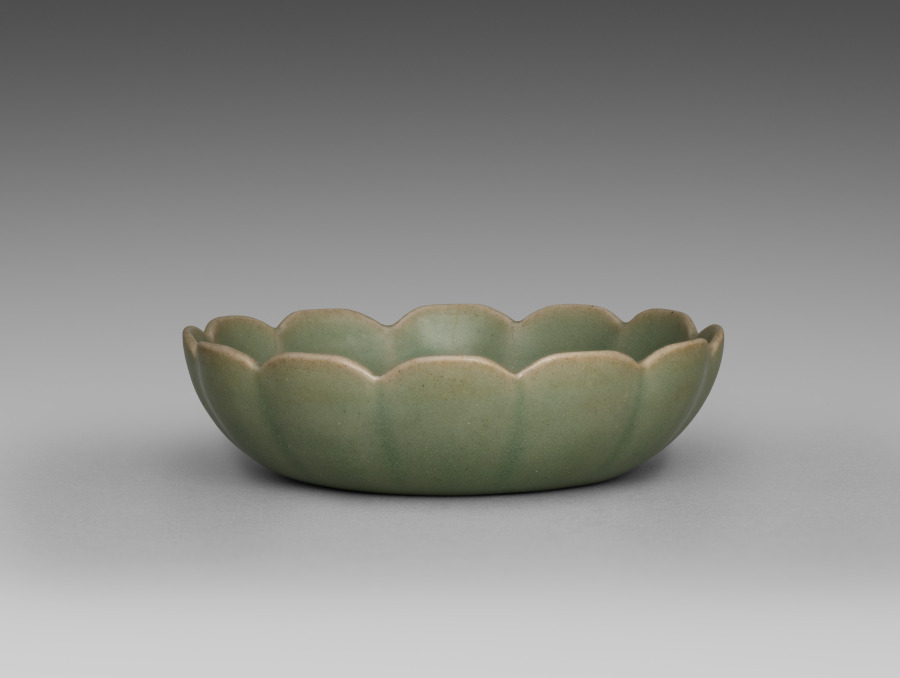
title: Celadon Dish with Molded Phoenix Design in the Shape of a Flower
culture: Korea, Goryeo dynasty (918–1392)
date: 1200s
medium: Celadon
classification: Ceramic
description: Celadon wares intended for everyday use—such as this dish—were among the most common burial objects placed in tombs during the Goryeo period (918–1392). Furnishing tombs with elaborate assemblages of objects was believed to honor the deceased and provide comfort in the afterlife. This dish, featuring the image of a flying phoenix, was likely a cherished possession that accompanied its owner to their final resting place.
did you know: The phoenix motif at the center of this dish symbolizes cosmic harmony and prosperity in traditional East Asian cultural and artistic expression.